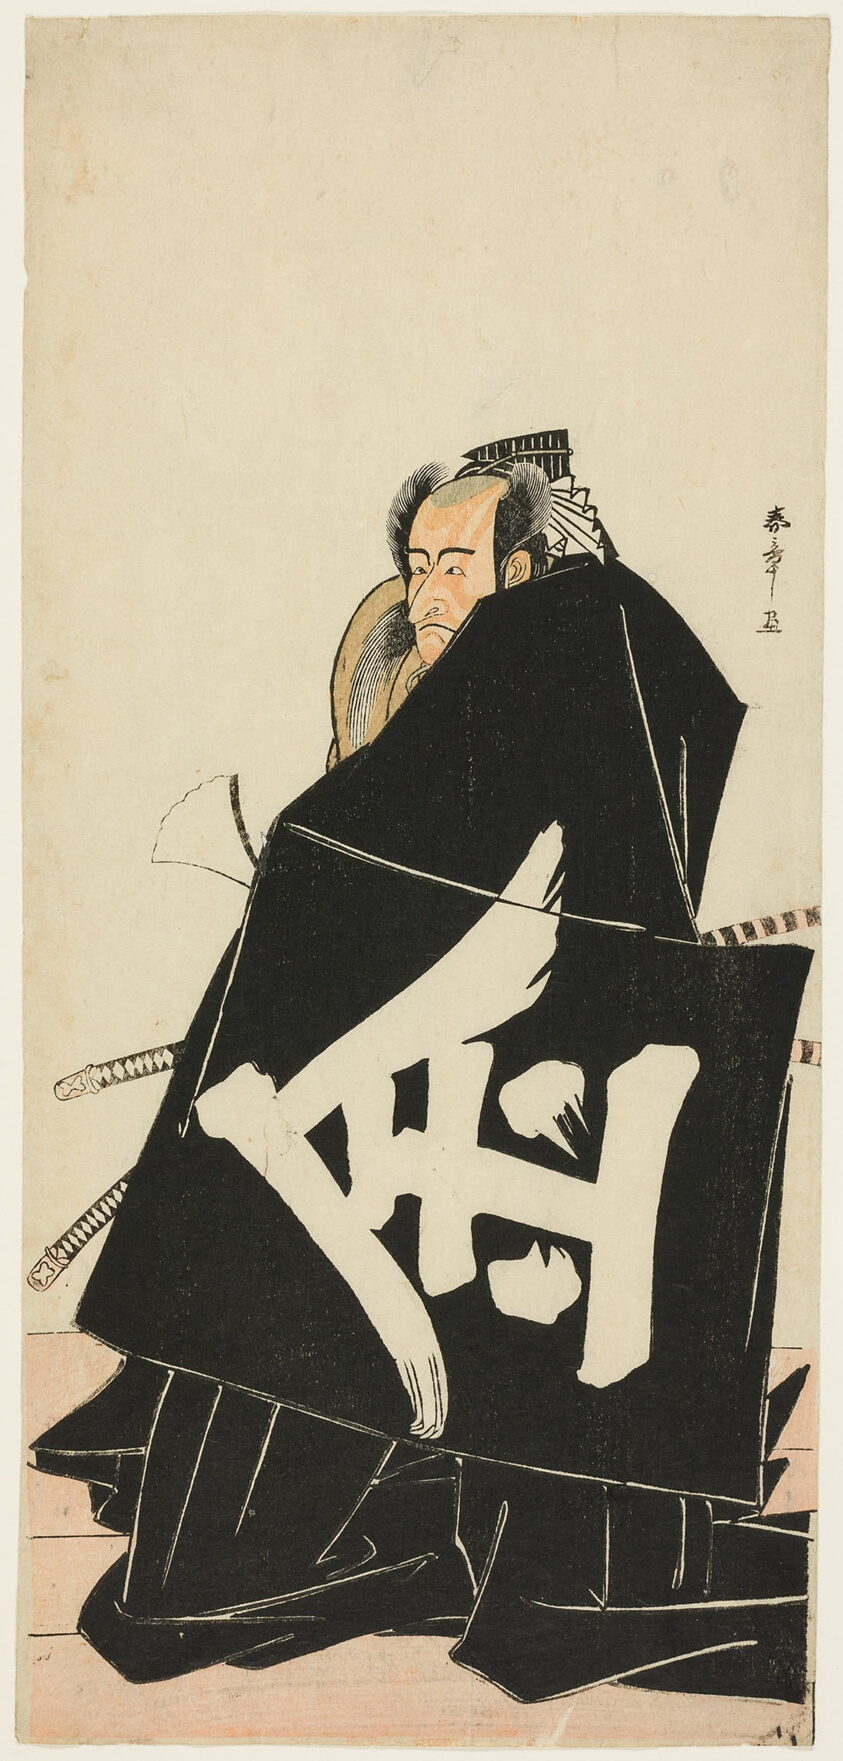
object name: Print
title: The Actor Ichikawa Danjuro V as Sakata Hyogonosuke Kintoki, in the Play Shitenno Tonoi no Kisewata (Raiko's Four Intrepid Retainers in the Costume of the Night Watch), Performed at the Nakamura Theater from the First Day of the Eleventh Month, 1781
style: Japanese (culture or style)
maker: Katsukawa Shunsho 勝川 春章; Japanese, 1726-1792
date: c. 1781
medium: Color woodblock print; hosoban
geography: Japan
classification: woodblock print; print; asian art